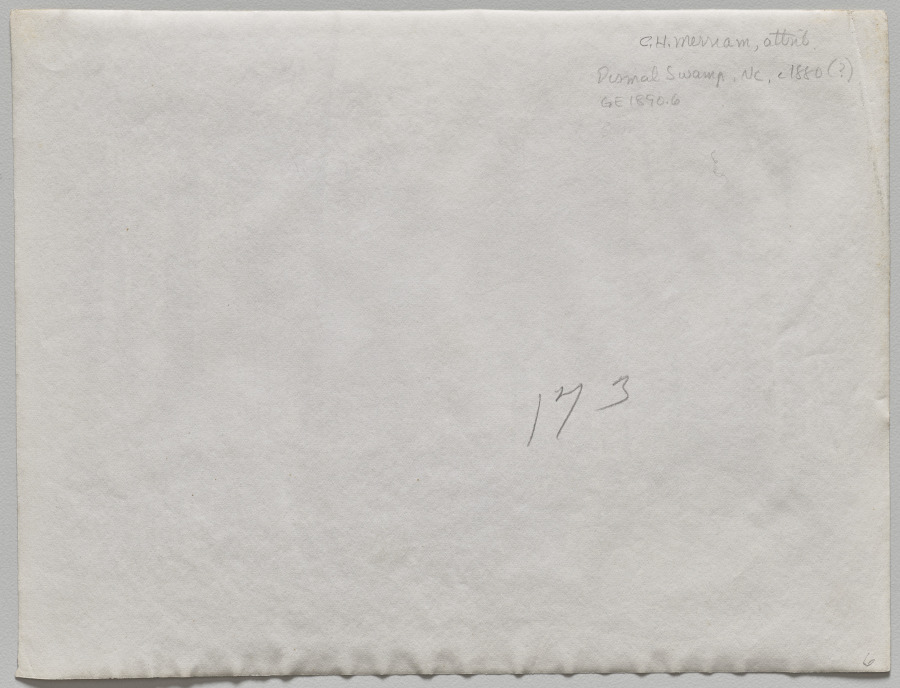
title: Great Dismal Swamp, Virginia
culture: America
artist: Israel Cook Russell (American, 1852–1906)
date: c. 1872–90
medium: albumen print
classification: Photograph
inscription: Handwritten in graphite on verso of photograph and mat: "C.H. Merriam, attrib.; Dismal Swamp, NC, c. 1880 (?); GE 1890.6; 173"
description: Israel Cook Russell’s view of the Great Dismal Swamp, which straddles the border between Virginia and North Carolina, evokes both the locale’s abundance of timber and its sense of desolation. Russell, a celebrated geologist, took care to express the geological and biological forces that shaped landscapes but also to create images of artistic value.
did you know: From the 1700s through the Civil War, the Great Dismal Swamp’s timber was harvested by slave labor, yet the swamp also housed numerous people who had escaped slavery.